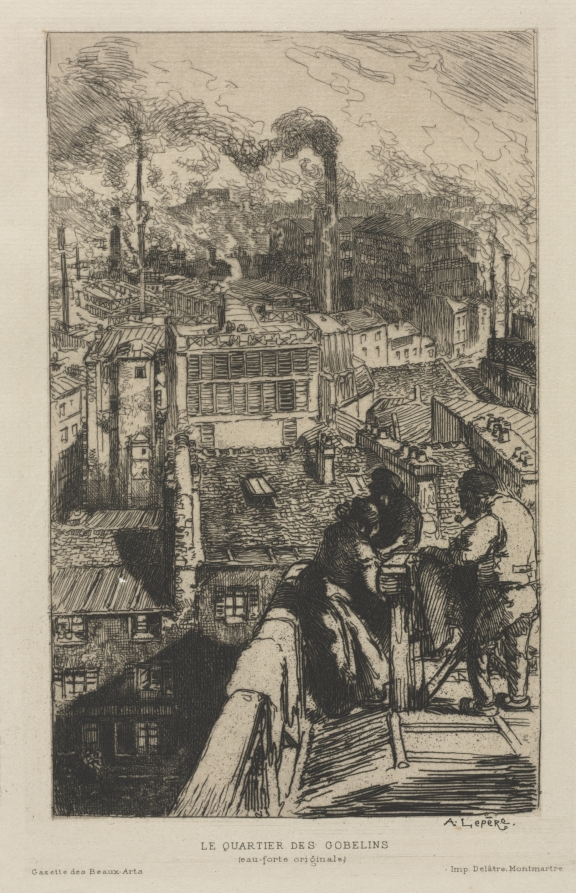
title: The Gobelin Quarter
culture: France, 19th century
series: published in the Gazette des Beaux Arts, 1986, vol. XVI, p. 300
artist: Auguste Louis Lepère (French, 1849–1918)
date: 1893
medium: etching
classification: Print